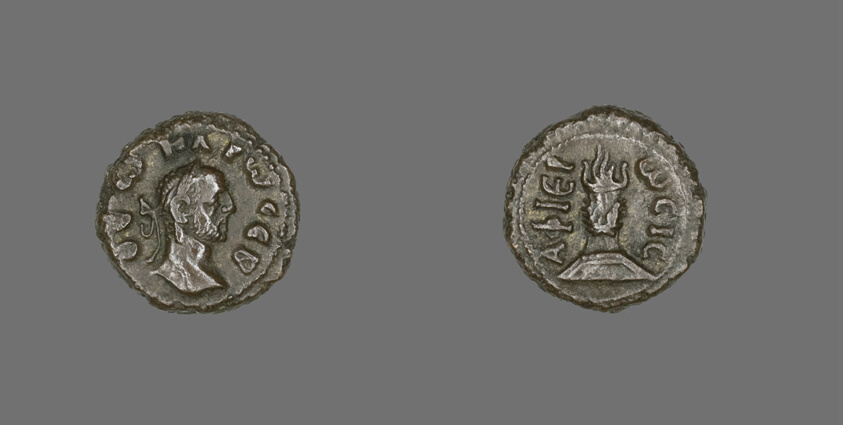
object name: Coin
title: Coin Portraying Emperor Carus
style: roman (ancient, style or period), ancient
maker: Roman, minted in Alexandria, Egypt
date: 282-283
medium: Billon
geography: Roman Empire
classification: coin; ancient art